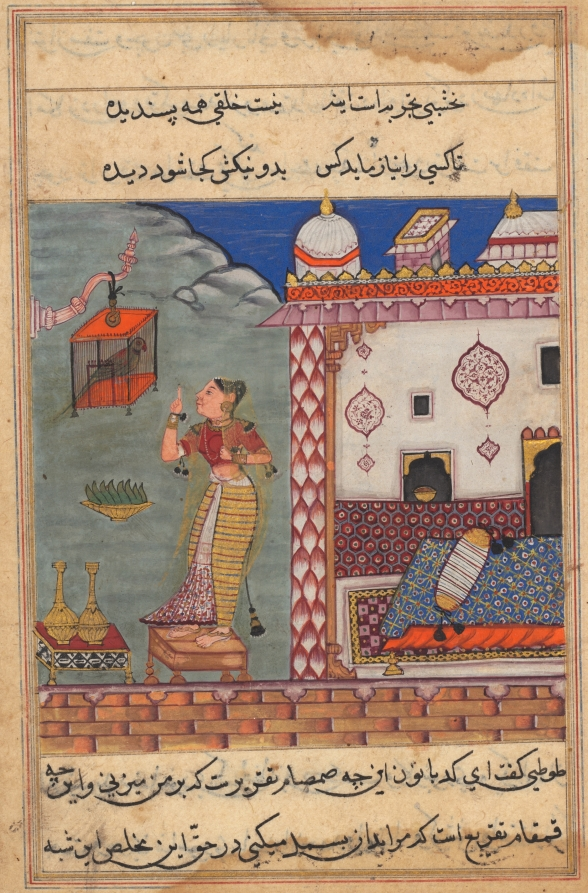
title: The Parrot Addresses Khujasta at the Beginning of the Twenty-seventh Night, form a Tuti-nama (Tales of a Parrot)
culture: Mughal India, court of Akbar (reigned 1556–1605)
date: c. 1560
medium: gum tempera, ink, and gold on paper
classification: Painting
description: Khujasta prepares herself each night to secretly meet her new lover, but before she is able to leave, her pet parrot Tuti cleverly entices her to stay with the tantalizing beginnings of a story. Tuti’s telling of the story takes all night, and by the time he reaches the end, it is too late for her rendezvous. A bowl of paan, areca nuts wrapped in betel leaves, has been set out for chewing, freshening breath, and its various pleasurable effects.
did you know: Khujasta has been drinking wine—evidenced by the bottles on the low table before her.